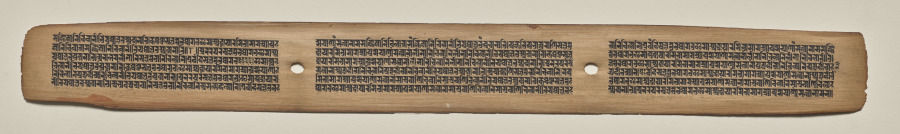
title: Text, Folio 91 (recto), from a Manuscript of the Perfection of Wisdom in Eight Thousand Lines (Ashtasahasrika Prajnaparamita-sutra)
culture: Eastern India, Bihar, Vikramashila Monastery. Painting: Nepal, Kathmandu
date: Sunday, September 14, 1119 (year 239 of the Newar Samvat in the month of Ashvina)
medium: gum tempera and ink on palm leaves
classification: Painting